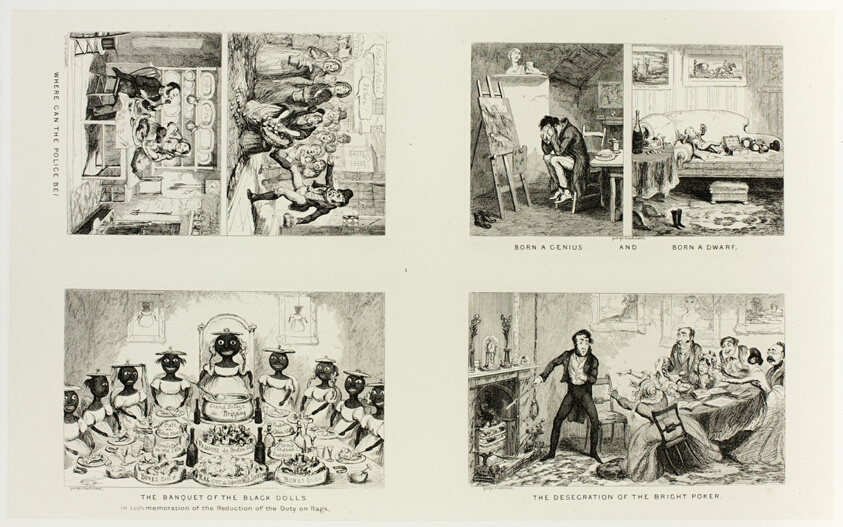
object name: Print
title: Where Can the Police Be? from George Cruikshank's Steel Etchings to The Comic Almanacks: 1835-1853 (top left)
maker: George Cruikshank (English, 1792-1878); published by Pickering & Chatto (English, 19th century)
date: 1847, printed c. 1880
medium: Four steel etchings in black on cream India paper, laid down on off-white card (chine collé)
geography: England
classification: etching; paper; print; prints and drawing